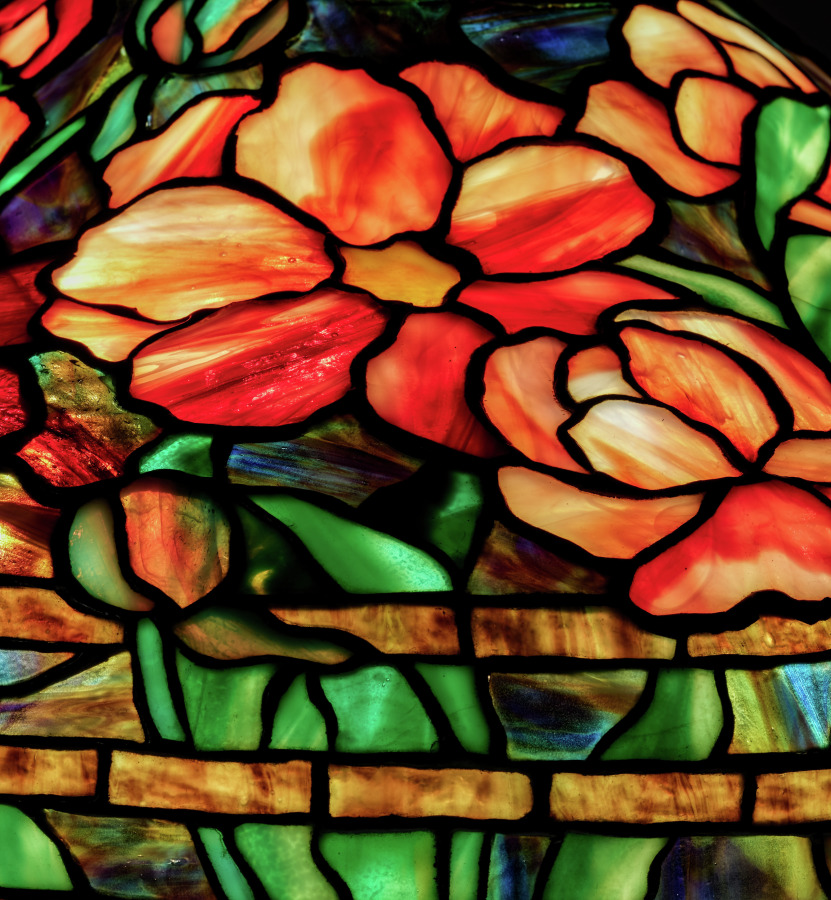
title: Peony Table Lamp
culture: America, New York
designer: probably by Clara Wolcott Driscoll (American, 1861–1944)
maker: Tiffany Studios (United States, New York, 1902–32)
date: c. 1905–15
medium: Leaded glass, bronze, ceramic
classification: Lamp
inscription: Shade impressed: TIFFANY STUDIOS NEW YORK 1475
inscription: Based scratched: BP250 L.C. Tiffany Bronze Pottery Favrile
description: In the 1870s a renewed emphasis on natural landscapes ushered in a generation of cottage gardeners who delighted in planting perennials in large quantities. Louis Comfort Tiffany was among those who championed the lush, sometimes wild-looking displays of varied floral species in the garden at his Long Island estate, Laurelton Hall. Tiffany encouraged his designers to take inspiration from his garden by shipping fresh cuttings almost weekly to his studios. Ohio native Clara Wolcott Driscoll and her team of female designers created floral patterns for lamps and mosaics based on the colorful blooms of spring that became among the most sought after and commercially successful of Tiffany’s production.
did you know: The base of this lamp looks like it is made of metal, but it is really just a ceramic base painted to look like bronze.